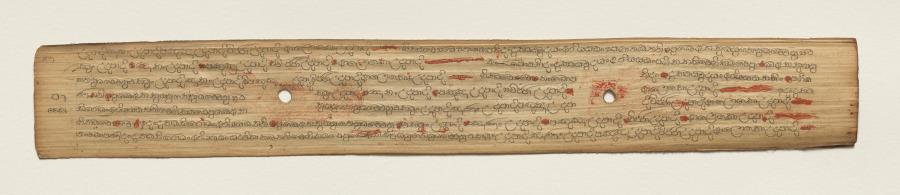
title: Leaf from a Buddhist Manuscript (recto)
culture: Sri Lanka, Singhalese, Late 17th century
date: c. 1700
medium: fiber paper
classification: Manuscript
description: Palm leaf material is still used for manuscripts in Sri Lanka. The palm leaves are prepared first by boiling them, drying them in the sun, and then rubbing them with oils. Scribes then use a metal stylus to incise the text. Then charcoal powder is wiped across the pages, filling in only the inscribed lines.